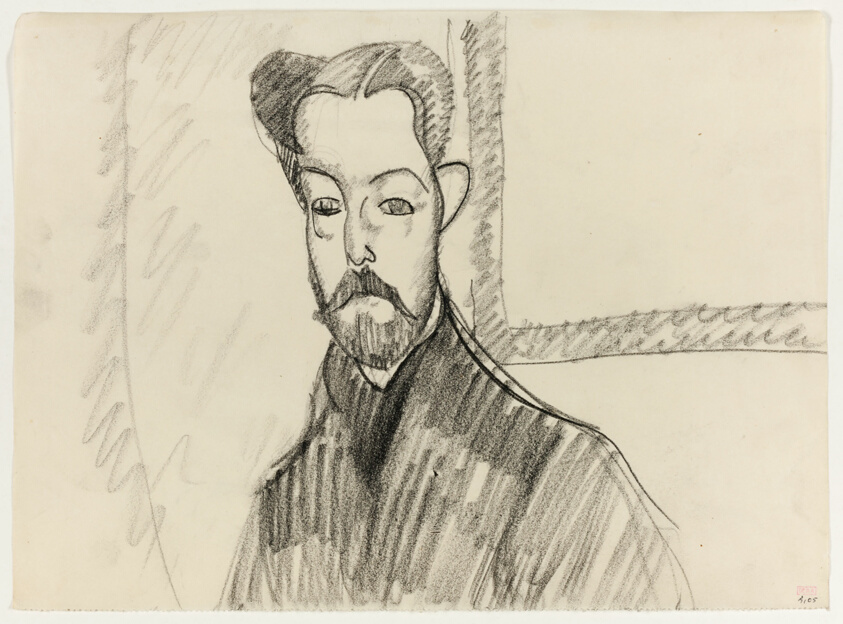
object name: Drawing and Watercolor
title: Portrait of Paul Alexandre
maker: Amedeo Modigliani (Italian, 1884–1920)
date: c. 1909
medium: Black fabricated chalk on cream wove paper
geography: Italy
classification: prints and drawing; chalk; drawings (visual works)